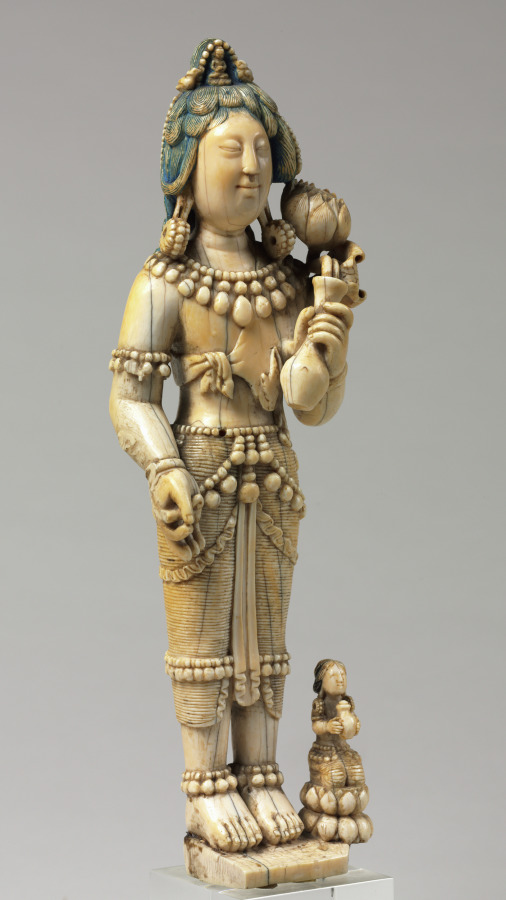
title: Bodhisattva of Compassion (Avalokiteshvara)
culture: Tibet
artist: Choying Dorje, the Tenth Black Hat Karmapa (Tibetan, 1604–1674)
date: 1647–48 or 1658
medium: ivory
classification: Ivory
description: Choying Dorje was one of the most influential monastic leaders in the history of Tibetan Buddhism. Known as the Tenth Karmapa, he was the head of the Karma Kagyu order of monks. His biographies state that from a young age he had a talent and passion for carving and painting images of bodhisattvas and other enlightened beings. Several of his original works survive, including this exceptionally rare ivory carving of Avalokiteshvara holding a lotus. Stylistically it is related to images from southwestern China, where he stayed in exile from 1647 to 1648 in the wake of Mongol invasions that destroyed many Kagyu monasteries in Tibet. While there he was exposed to Chinese art, which was favored by his patrons. The face has the distinctive elongation unique to Dorje's personal style. This sculpture could have been made during his time of exile or a decade later after his return to Tibet.